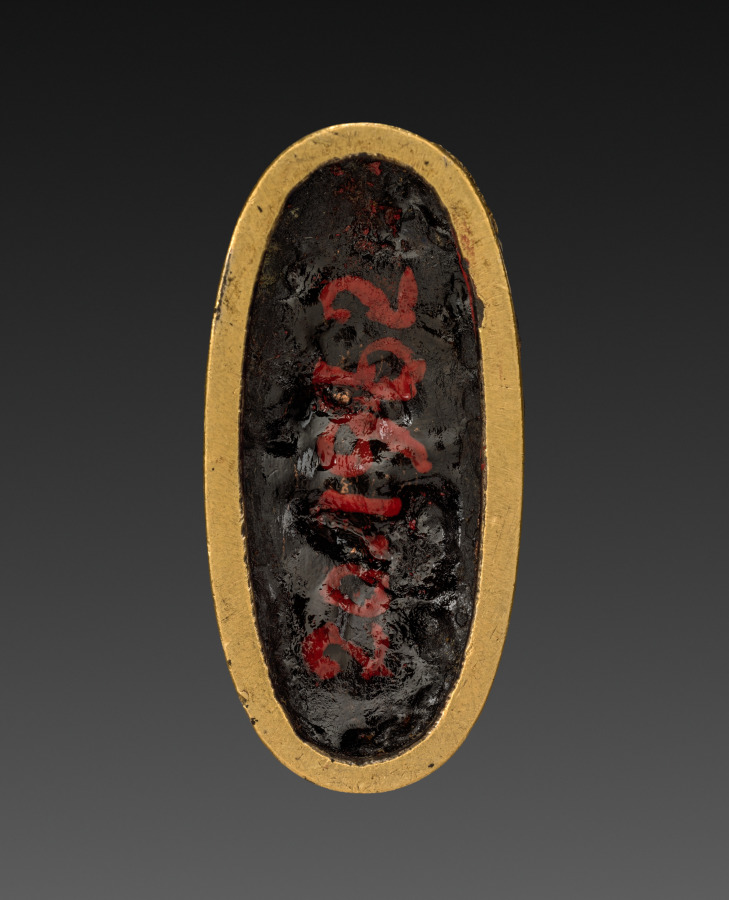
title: Sword-Hilt Pommel (Kashira)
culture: Japan, Edo period (1615–1868)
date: 1700–1850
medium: shakudo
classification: Arms and Armor